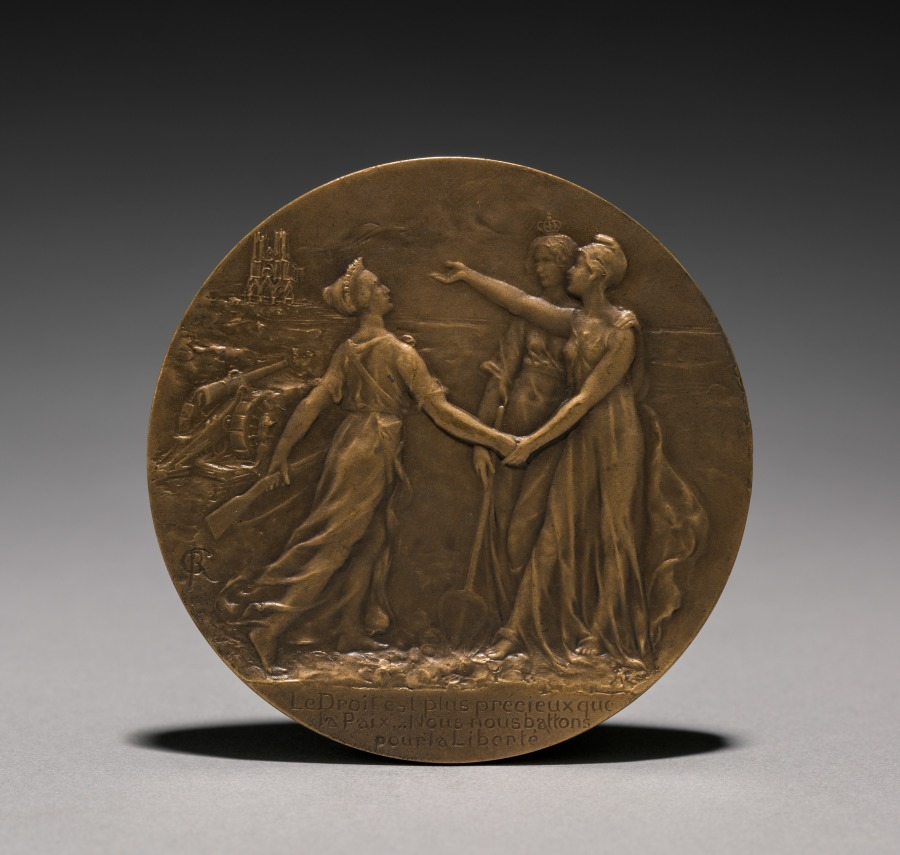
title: Medal (obverse)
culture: France, early 20th century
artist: René Grégoire (French, 1871–1945)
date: 1914–1918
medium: bronze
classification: Metalwork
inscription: "Wilson."